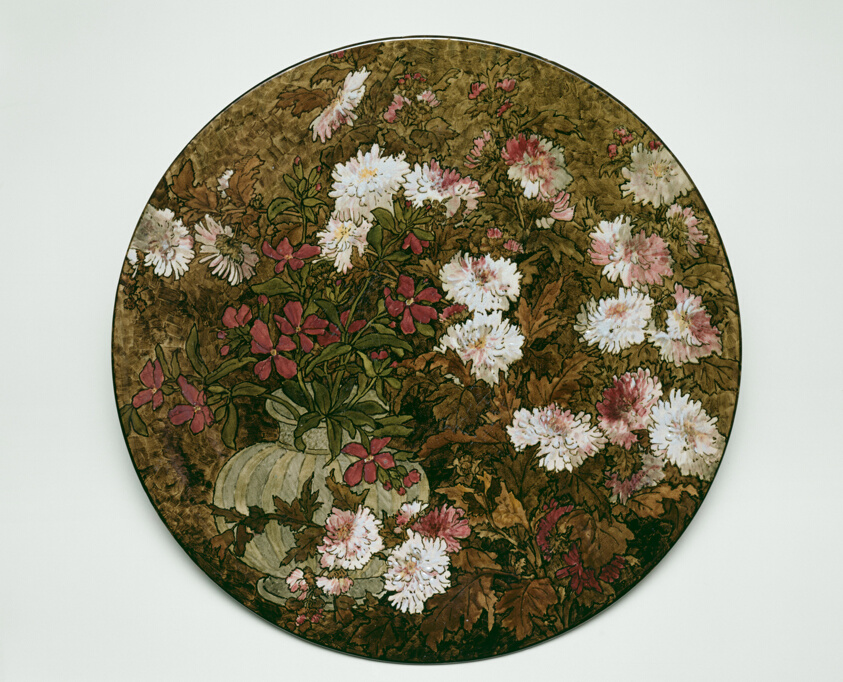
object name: Ceramics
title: Plaque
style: 19th century, studio pottery, British Arts and Crafts Movement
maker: John Bennett (American, born England, 1840–1907)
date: 1879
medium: Earthenware, glaze, slip, and enamel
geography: New York City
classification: plaque (flat object); pottery; ceramics; american decorative arts; american arts; decorative arts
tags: floral, chrysanthemums, flowers, vase